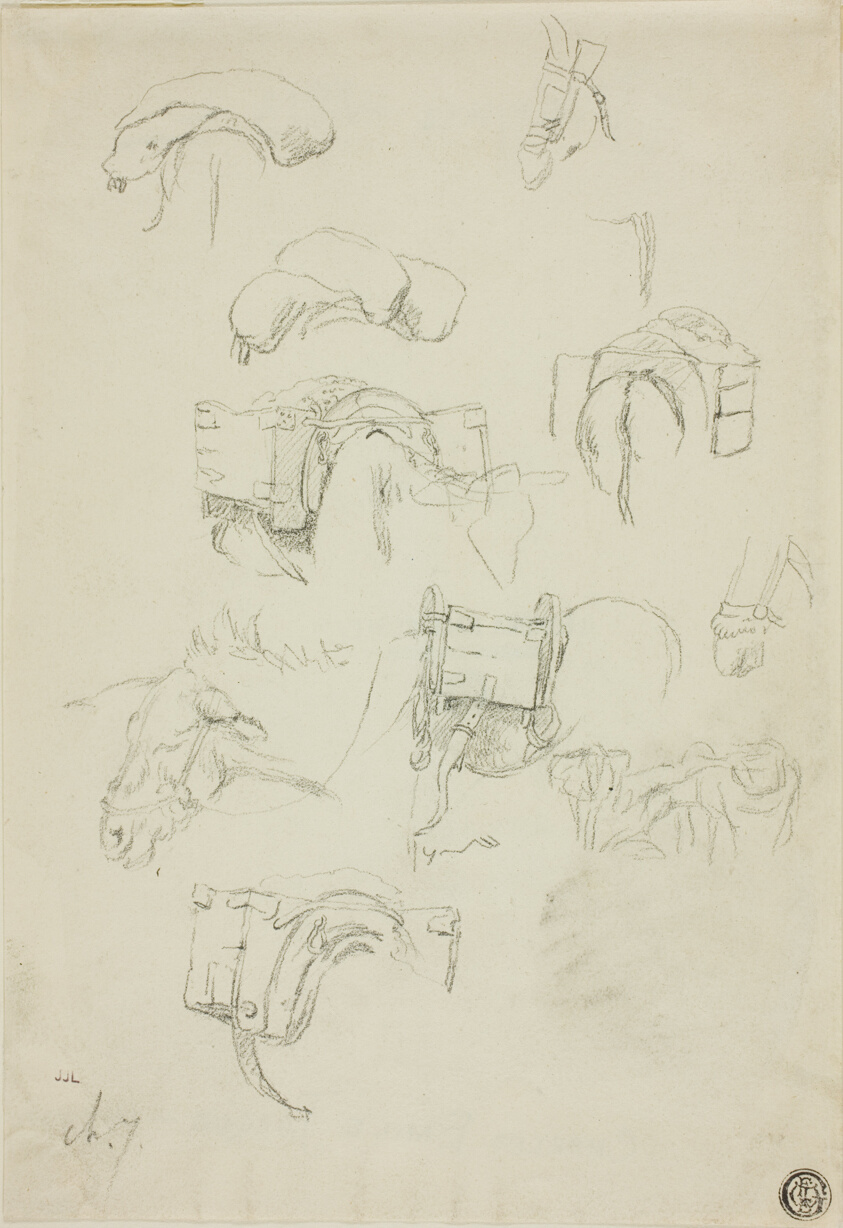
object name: Drawing and Watercolor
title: Sheet of Sketches: Details of a Donkey and Accoutrements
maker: Attributed to Charles Émile Jacque; French, 1813-1894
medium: Graphite on cream wove paper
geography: France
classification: chalk; drawings (visual works); prints and drawing